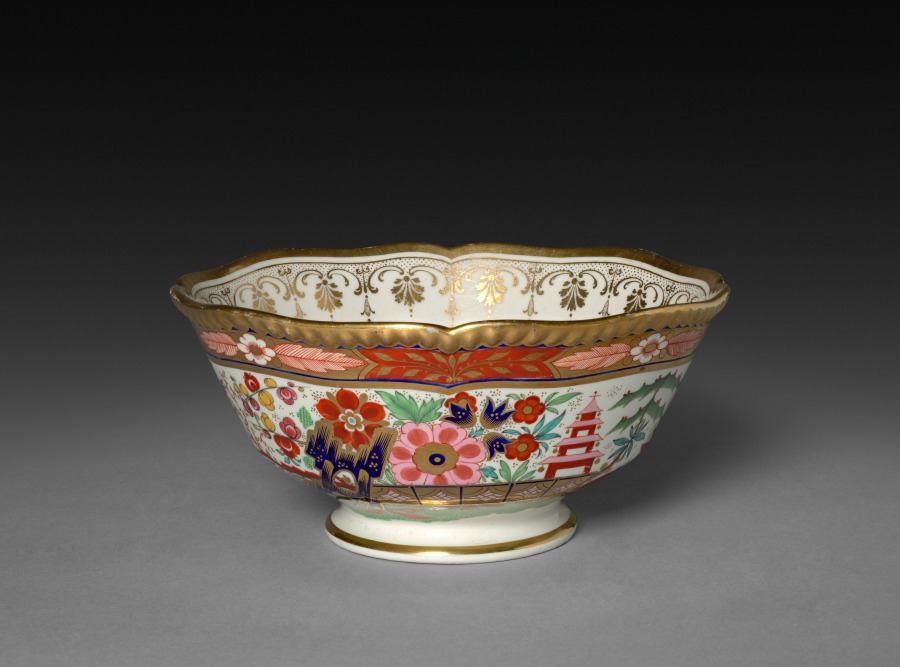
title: Bowl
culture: England, Derby, late 18th Century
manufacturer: Derby (Crown Derby Period) (British)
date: late 1700s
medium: porcelain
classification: Ceramic